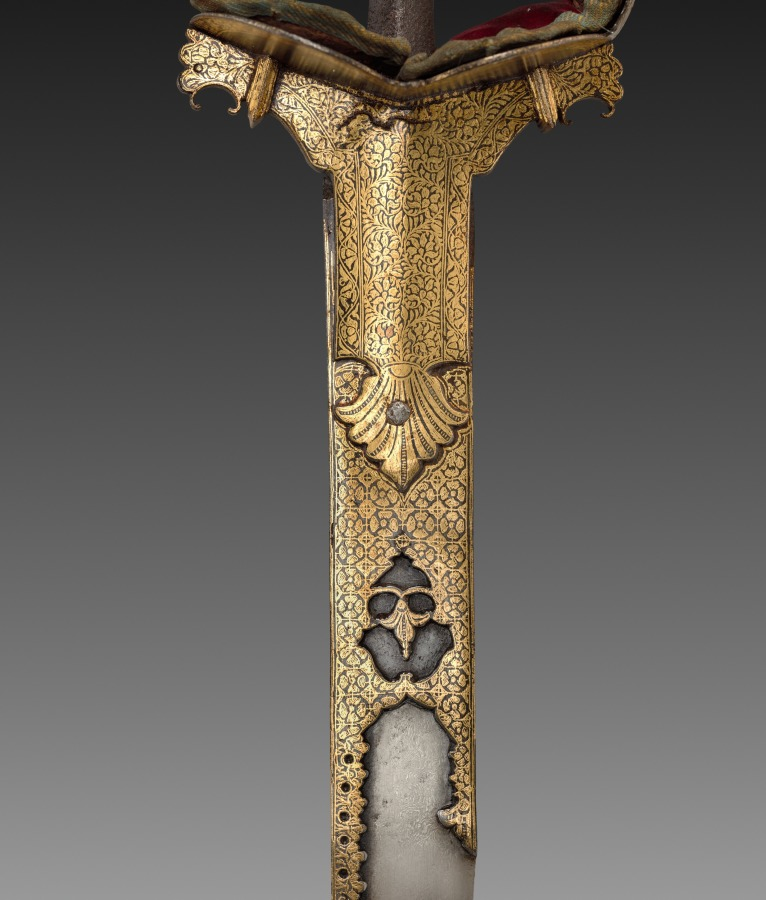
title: Sword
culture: India, perhaps Deccan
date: 1700s–1800s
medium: Watered steel blade with iron hilt inlaid with gold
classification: Arms and Armor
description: Straight swords were typical of those used among military and aristocratic circles in the southern regions of the Deccan, in contrast to the curved swords favored by Central Asian equestrians. Increased contact between the Mughal north and the Deccan south during the 1600s led to the appearance of the Deccan-style sword in courtly portraits made during the time of Jahangir and Shah Jahan, and later.